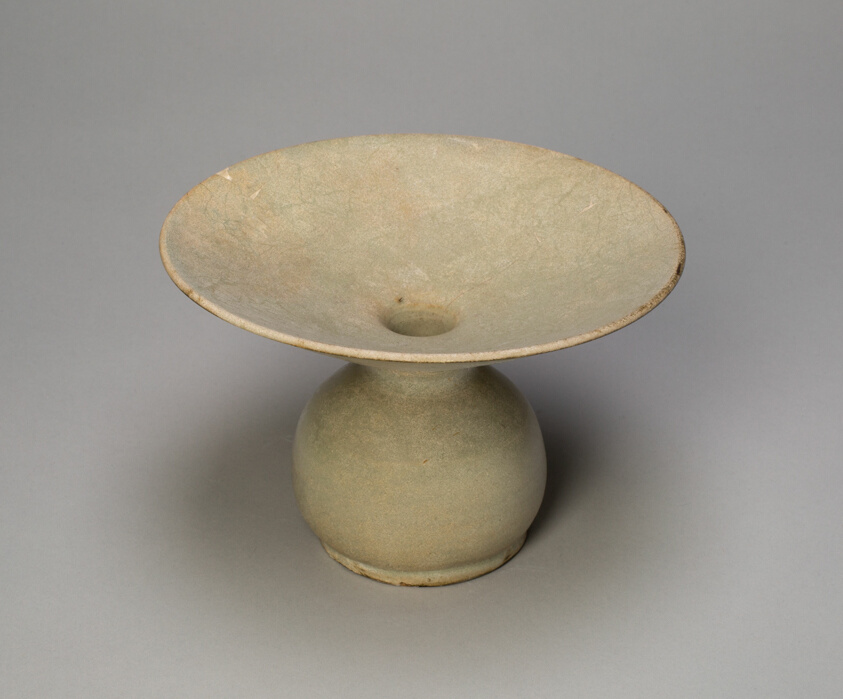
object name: Vessel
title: Spittoon (Zhadou)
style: Chinese (culture or style)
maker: China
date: Tang dynasty (618–907), 9th century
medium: Yue ware; glazed stoneware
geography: China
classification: stoneware; asian art; ceramics; vessel